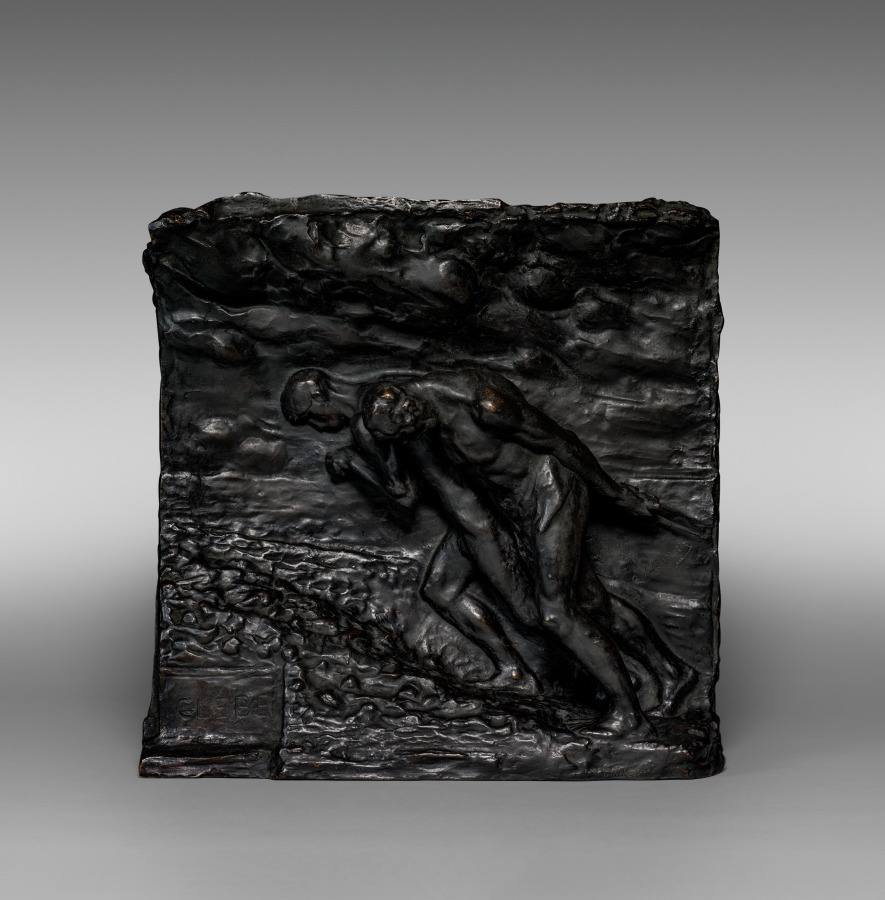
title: The Soil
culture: Belgium, 19th century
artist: Constantin Meunier (Belgian, 1831–1905)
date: c. 1890 – 1900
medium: bronze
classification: Sculpture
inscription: Signed right: "C. Meunier"; inscribed lower right front: "B. Verbeyot, Fondeur, Bruxelles."; lower left: "GLEBE"